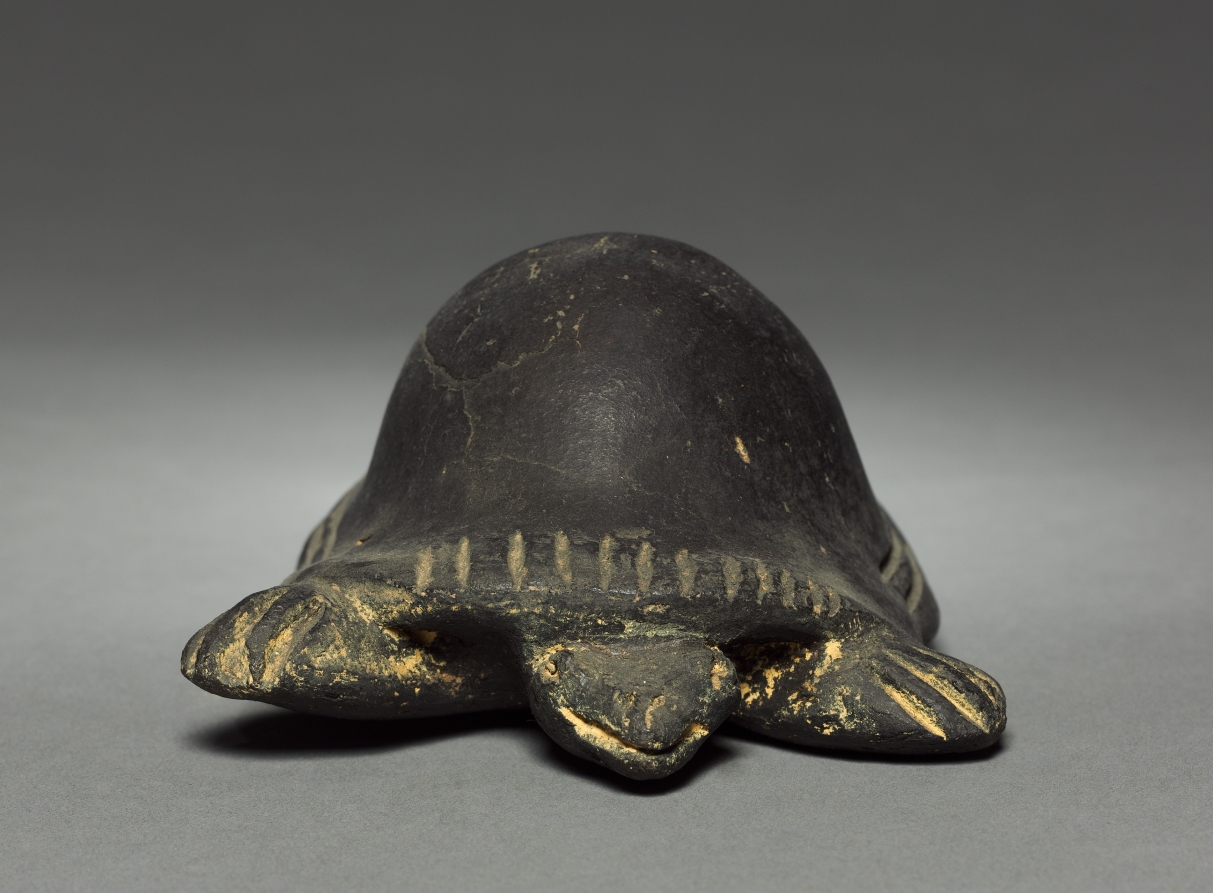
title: Turtle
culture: Colombia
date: before 1921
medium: pottery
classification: Ceramic